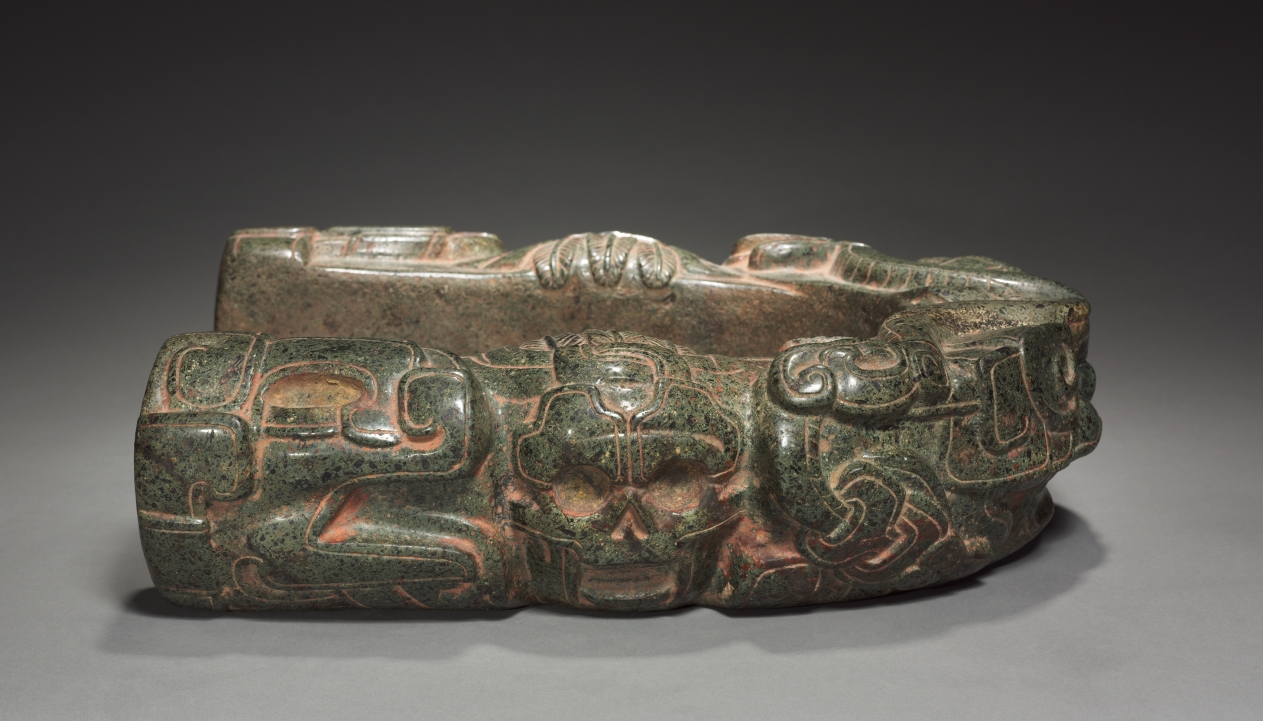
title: Ballgame Hip Protector (Yoke)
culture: Mexico, Gulf Coast, Classic Veracruz style (600-1100)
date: 600–900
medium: greenstone, pigment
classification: Sculpture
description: U-shaped ballgame sculptures imitate the shape of belt-like protectors, perhaps made of wood and padding, worn to shield ballplayers from injury when they returned the solid rubber ball from their hips. This fine example embodies a major theme of the ballgame: the connection between fertility and death. It is made of greenstone, a precious material that through its color symbolizes the lush burgeoning of nature after the rainy season. The imagery, however, is menacing: a monstrous head snarls from the curve, and human skulls appear on the sides.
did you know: The ballgame was a team sport played on specially constructed rectangular courts and involved striking a large solid rubber ball without using your hands.